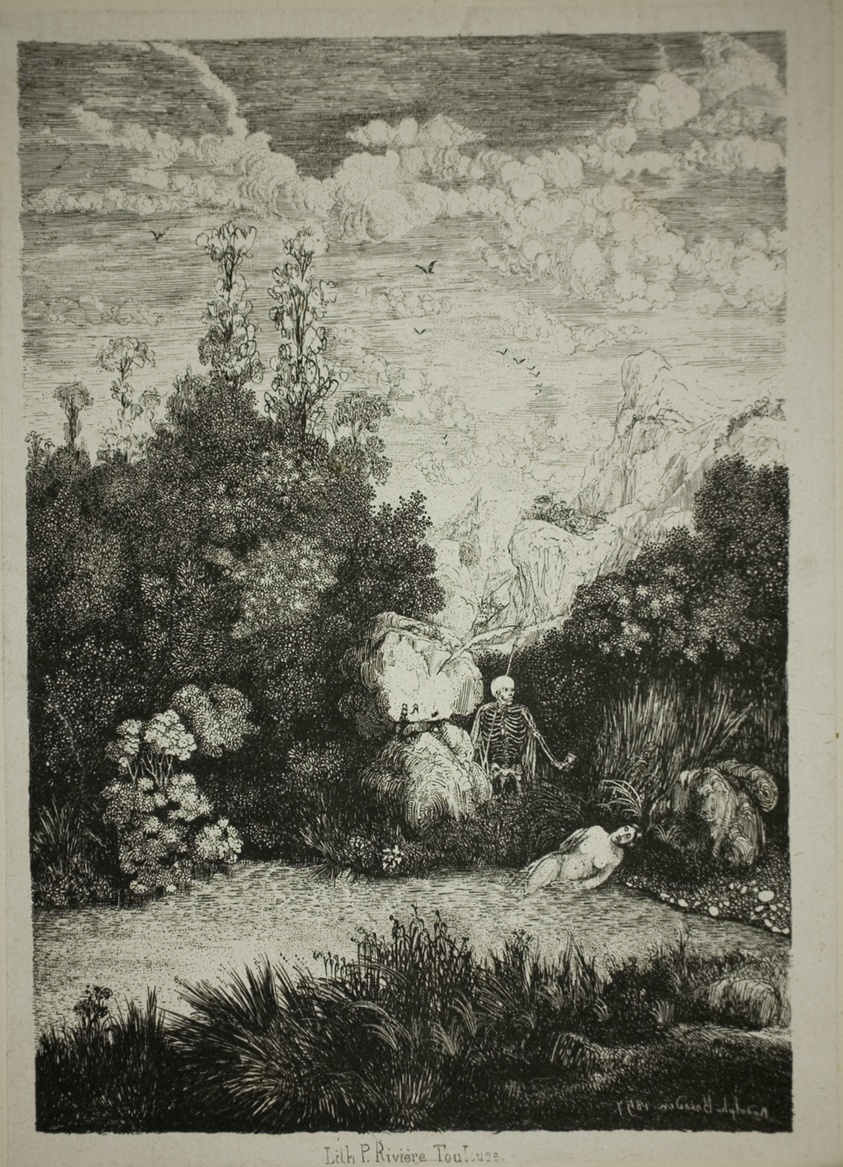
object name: Print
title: Bathing Woman and Death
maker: Rodolphe Bresdin (French, 1825-1885)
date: 1857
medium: Lithograph (etching transfer) on light gray chine, laid down on ivory card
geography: France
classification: lithograph; print; prints and drawing